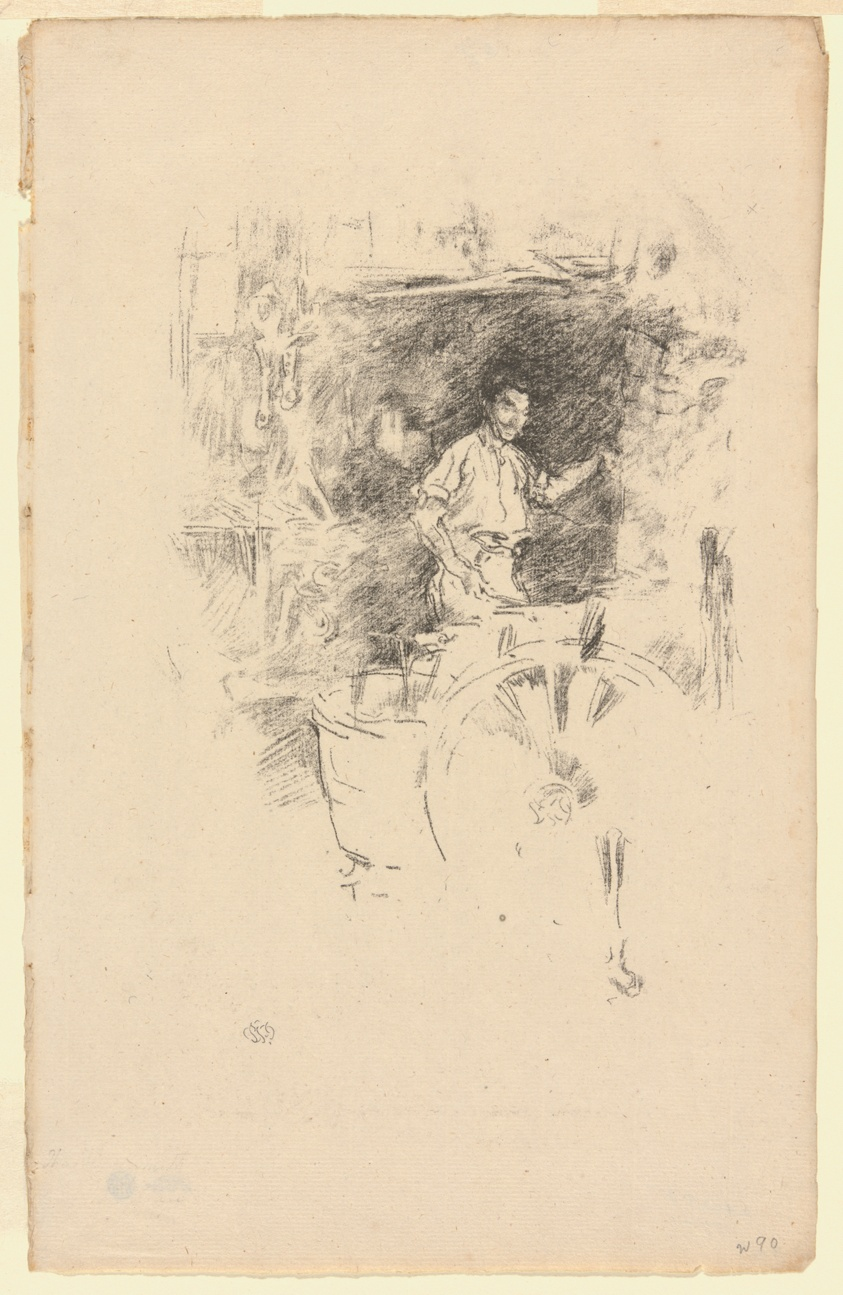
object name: Print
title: The Blacksmith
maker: James McNeill Whistler (American, 1834-1903)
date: 1895/96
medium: Transfer lithograph in black with stumping, on cream laid paper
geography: United States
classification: transfer lithograph; lithograph; print; prints and drawing; paper